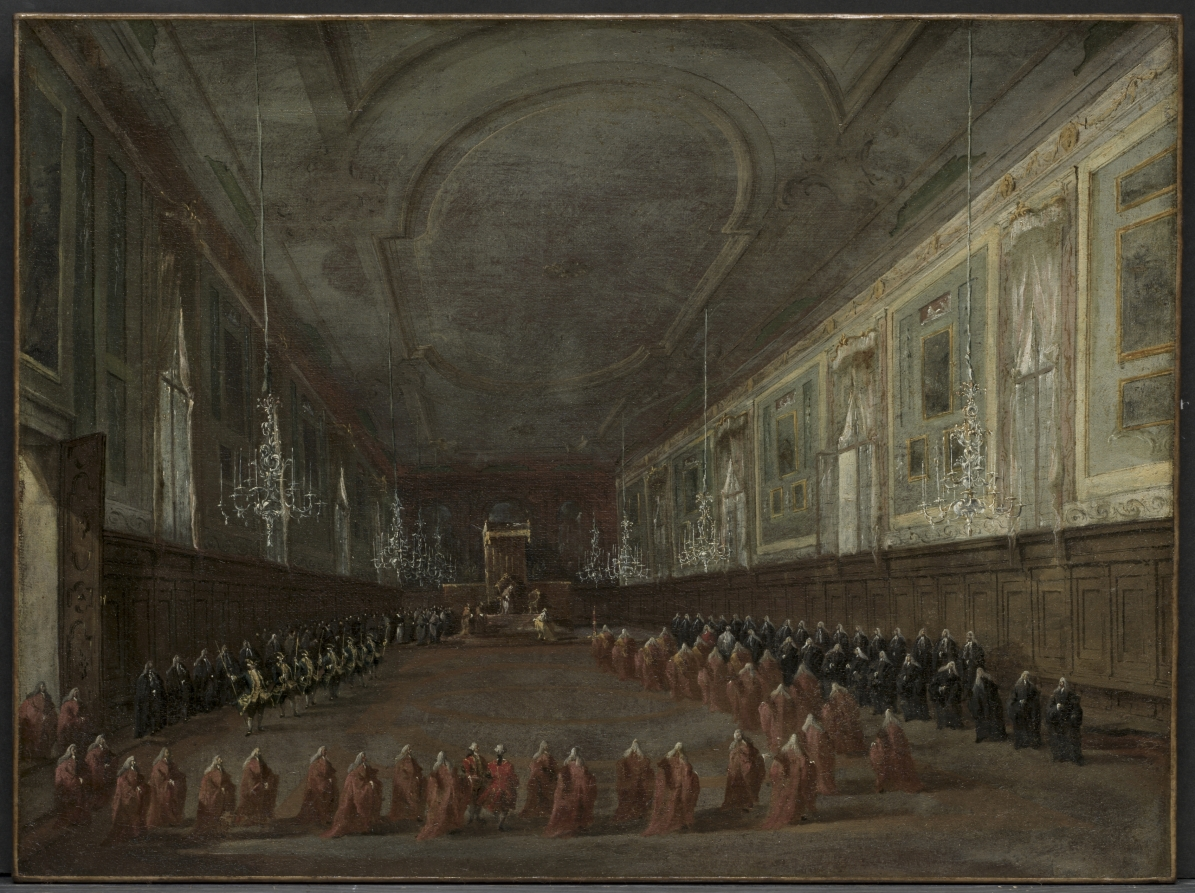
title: Pope Pius VI Descending the Throne to Take Leave of the Doge in the Hall of SS. Giovanni e Paolo, 1782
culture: Italy, 18th century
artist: Francesco Guardi (Italian, 1712–1793)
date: c. 1783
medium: oil on canvas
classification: Painting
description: The third scene in the series depicts one of the final events of the pope’s stay. At the back of the magnificent audience hall of Santi Giovanni e Paolo, the doge (in gold and white) approaches the throne to receive his papal blessing, with a line of red-robed senators in his wake.